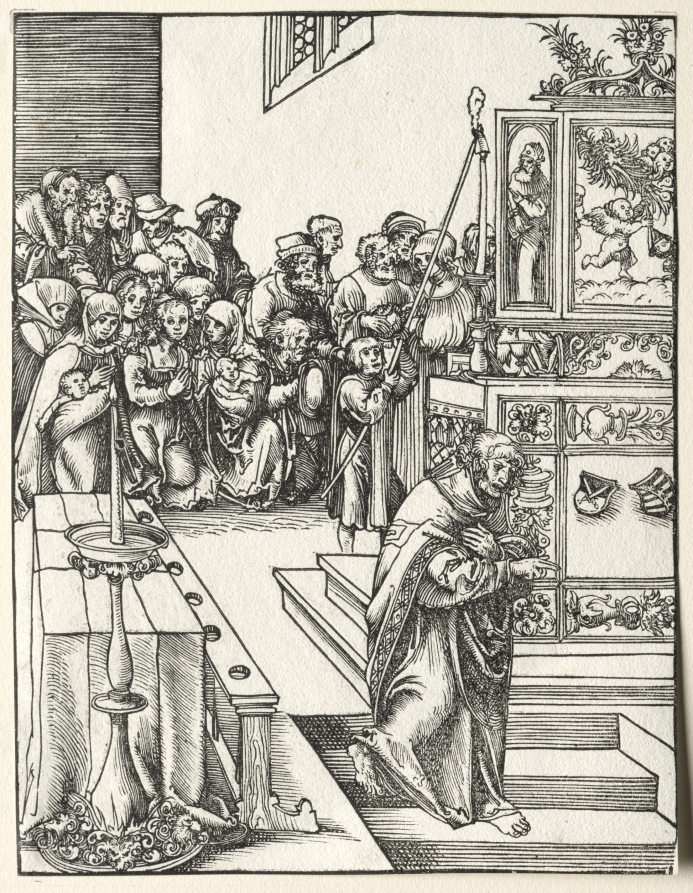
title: Martyrdom of St. John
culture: Germany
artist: Lucas Cranach (German, 1472–1553)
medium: woodcut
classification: Print